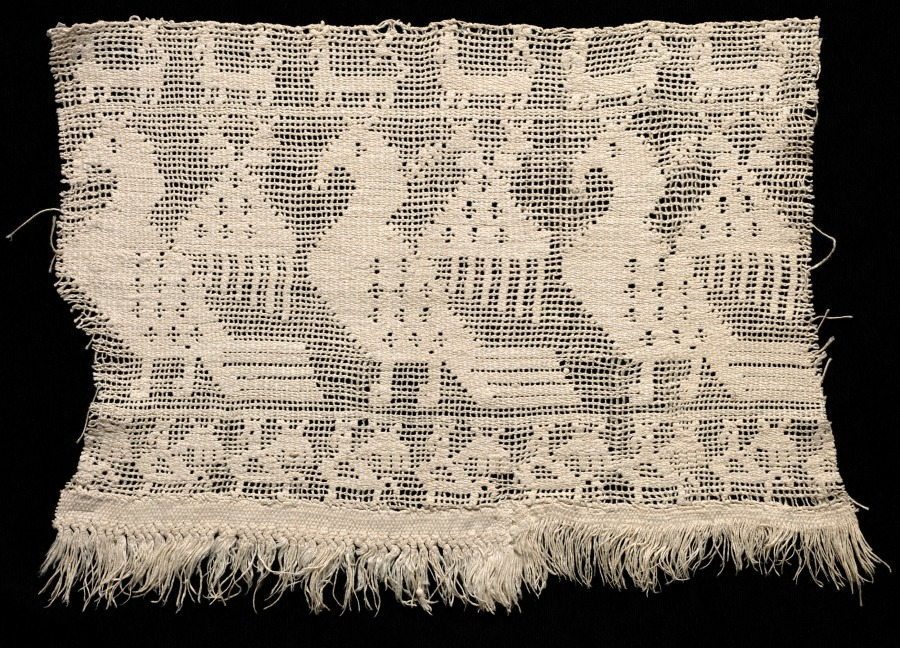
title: Fragment of a Border with Repeated Pattern of Fantastic Winged Animals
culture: Italy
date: c. 1550–1600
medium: Bleached linen (est.): needle lace, burato (twined ground and darned in two directions)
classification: Lace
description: A four-legged animal pattern repeats in the top register, and winged birds appear in the central and bottom register. The birds, which are significantly larger in the central panel, may be peacocks. For related works see 1920.1245.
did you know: The word lace derives from the Latin laqueus, meaning noose.